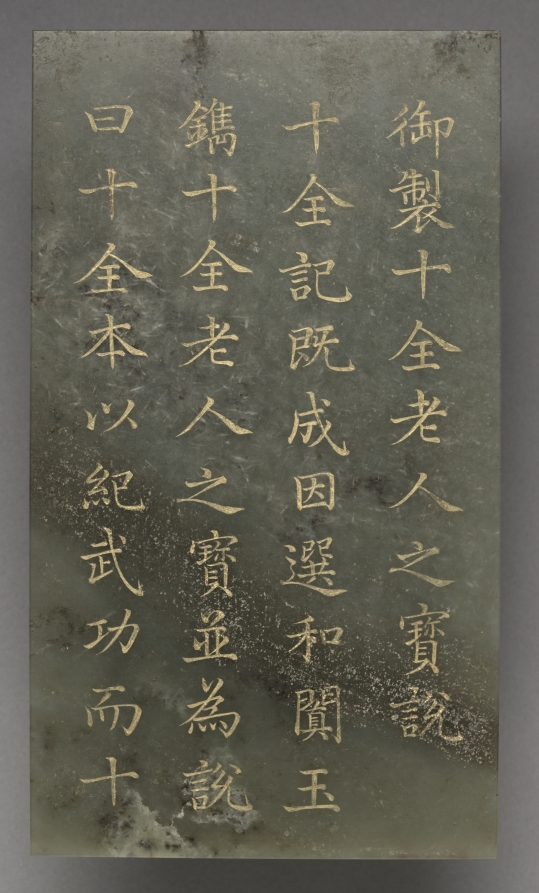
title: Tablet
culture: China, Qing dynasty (1644–1911), Qianlong reign (1736–95)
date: 1778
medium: jade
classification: Jade